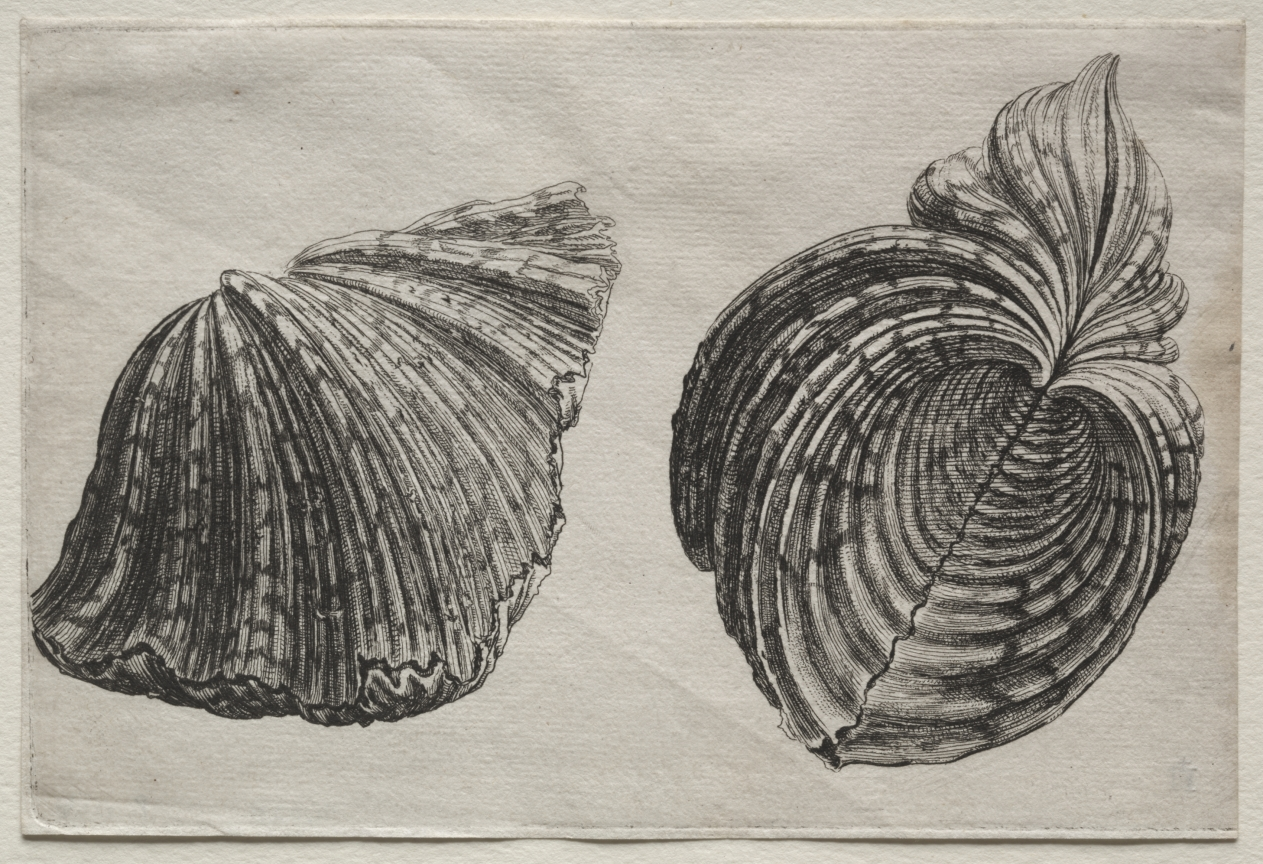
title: Shells: Hippopus maculatus Lam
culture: Bohemia, 17th century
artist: Wenceslaus Hollar (Bohemian, 1607–1677)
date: c. 1640s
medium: etching and engraving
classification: Print